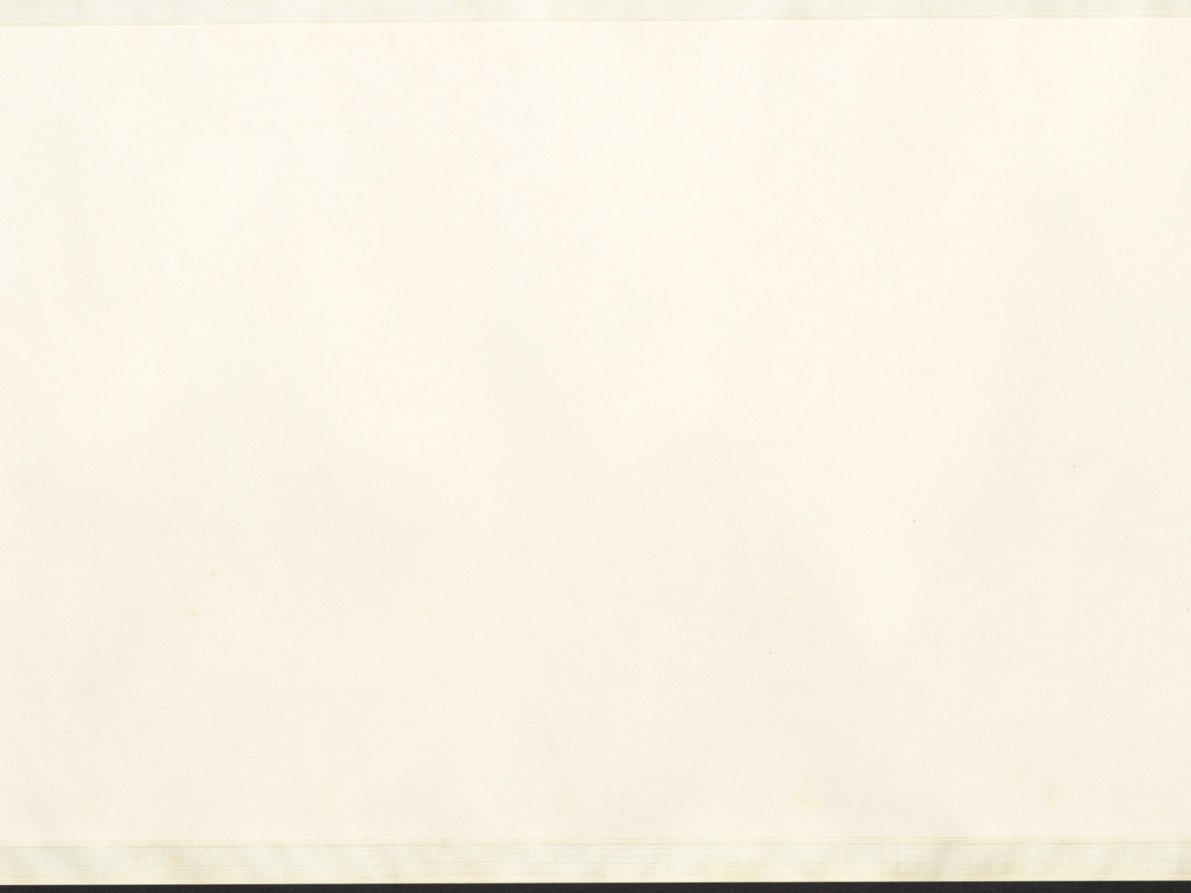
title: Fisherman's Joy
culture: China, Ming dynasty (1368–1644)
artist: Qian Gu (Chinese, 1508–c. 1578)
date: 1572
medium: Handscroll; ink and light color on paper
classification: Painting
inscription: Artist's inscription, signature, and seal: On the autumn day of the jen-shen year [1572], P'eng-ch'eng, Ch'ien Ku painted [this]. [seal] Hsüan-ch'ing shih. 2 colophons, both dated 1689, and 5 additional seals of Yün Shou-p'ing (1633-1690).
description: This painting has a scene showing two small crafts, each manned by two fishermen, practicing a traditional fishing method. In one of them, a man uses a bamboo pole to direct the movements of a cormorant bird sent into the water. Cormorant fishing, witnessed in some areas of the lower Yangzi River, appears in Zhe school paintings. Qian Gu may have borrowed these narrative figure scenes from Zhe school paintings, while his vantage point, brushwork, and soft tones align with the Wu school style. Scenes of fishermen appealed to urban and educated audiences who idealized the self-sufficient independence of fisherfolk.